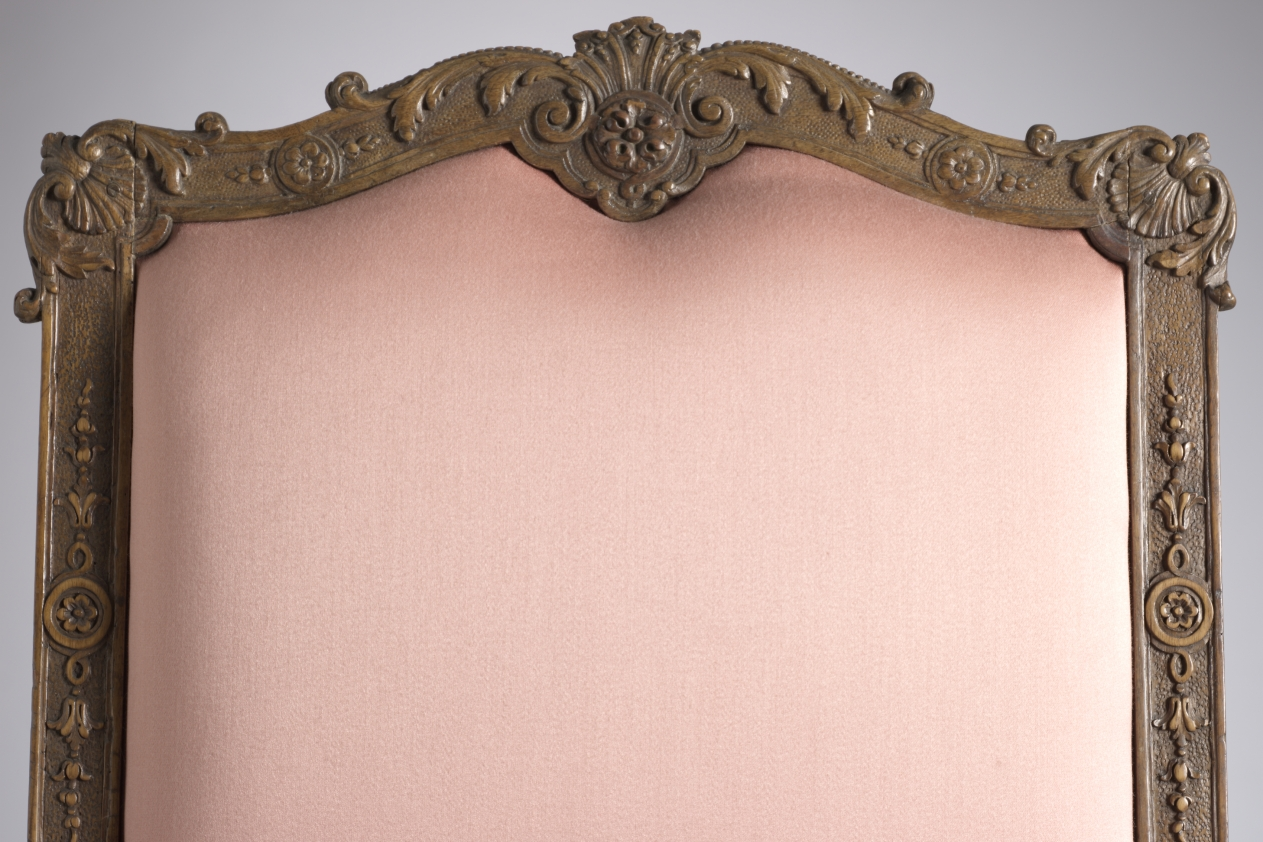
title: Armchair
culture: France, 18th century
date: c. 1715–1723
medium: oak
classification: Furniture and woodwork